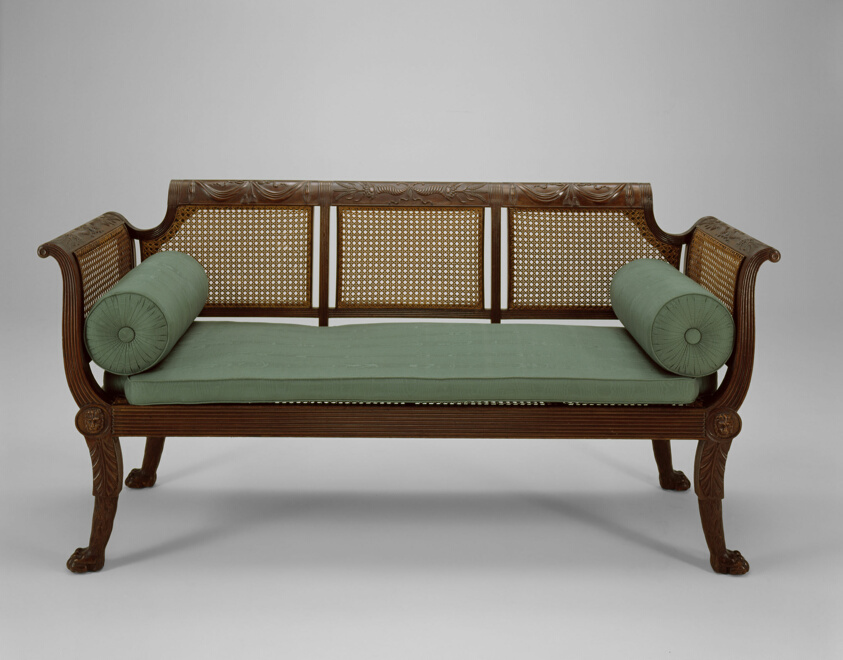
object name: Furniture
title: Settee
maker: Artist unknown (American, 18th–19th century); New York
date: 1815–20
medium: Mahogany with caning and upholstery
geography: New York City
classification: seating; furniture; american decorative arts; american arts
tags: furniture